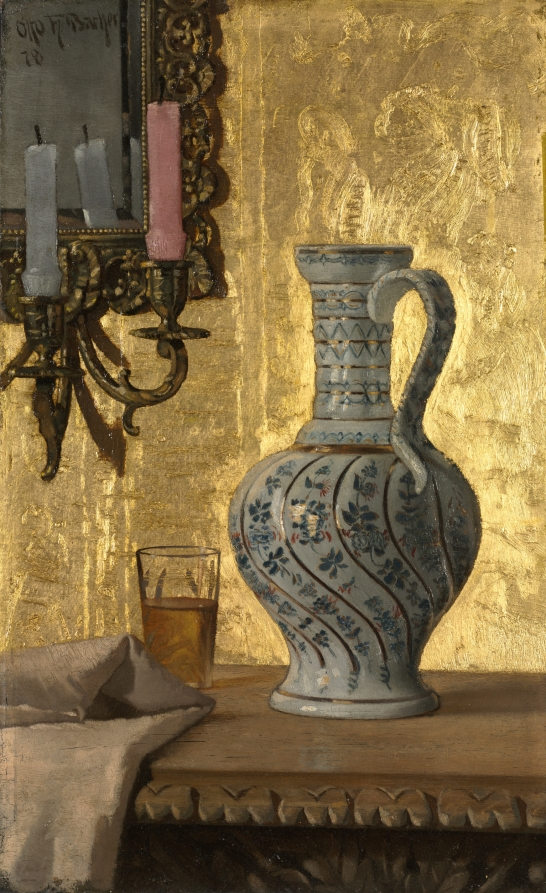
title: Pitcher and a Glass on a Table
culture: America, Ohio, Cleveland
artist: Otto H. Bacher (American, 1856–1909)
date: 1878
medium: oil on wood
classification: Painting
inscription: signed upper left corner: Otto H. Bacher / 78